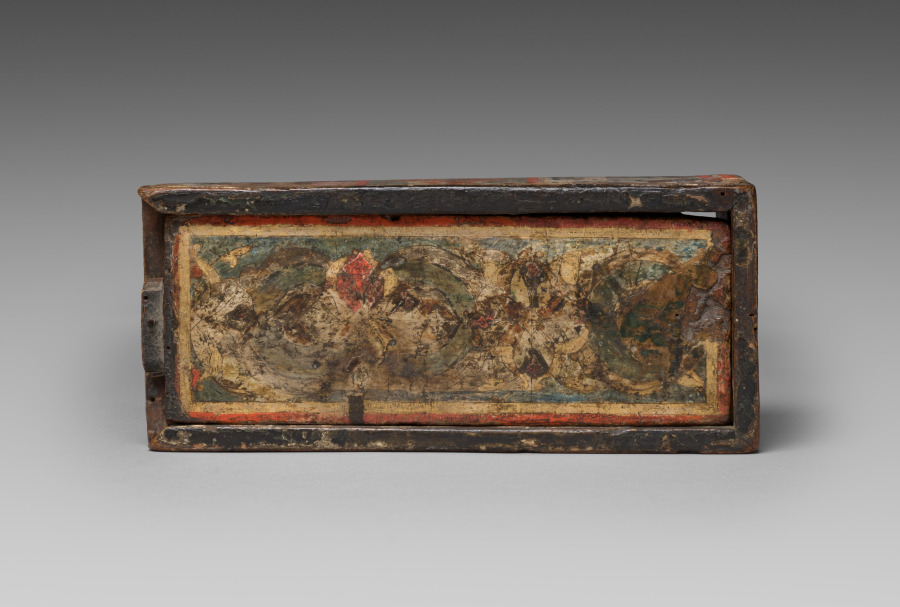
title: Reliquary Box with Scenes from the Life of John the Baptist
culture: Byzantium, Constantinople, late Byzantine period, 14th century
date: 1300s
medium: tempera and gold on wood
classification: Wood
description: John the Baptist--the first person to recognize Christ as the promised savior and the one who baptized him in the Jordan River--was one of the Byzantine Empire’s most revered saints. This box shows four scenes from the saint’s life: John’s martyrdom, Christ’s baptism, John’s birth, and the announcement of his birth to his parents. It probably once housed one of the saint’s relics; several were kept in churches and monasteries in Constantinople, including fragments of his skull and right arm and locks of his blood-clotted hair.